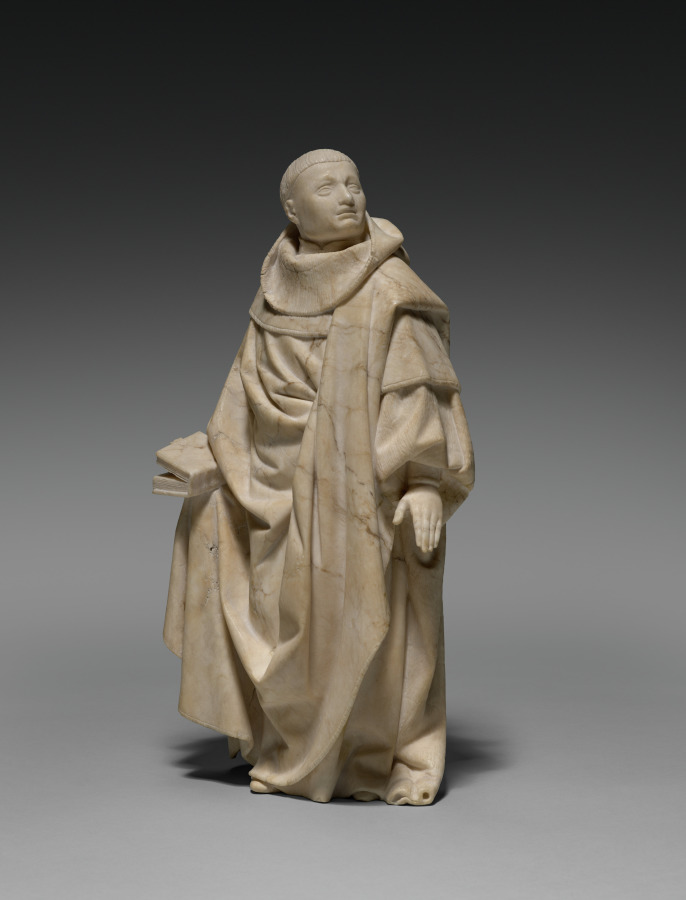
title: Mourner from the Tomb of John the Fearless and Margaret of Bavaria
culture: Spanish, Burgundy, Dijon, 15th century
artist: Jean de la Huerta (Spanish, active Burgundy, 1431–62)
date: 1443–45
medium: salins alabaster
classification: Sculpture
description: This monklike figure has a variously textured monochrome surface. Alabaster’s softness made it easy to carve details like the fabric and fur of the mourner’s robe and the codex pages in his hand. This is one of 40 mourners from an elaborate funeral procession beneath an intricately carved alabaster arcade. This mourner comes from the monastery of Champmol near Dijon, which became a primary burial place for Burgundian dukes. The sculpture was part of the tomb of John the Fearless (1371–1419), commissioned by his son Philip the Good (1396–1467), modeled after the earlier monument for Philip the Bold.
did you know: A plaster cast of this mourner adorns the Tomb of John the Fearless and Margaret of Bavaria in Dijon, France.